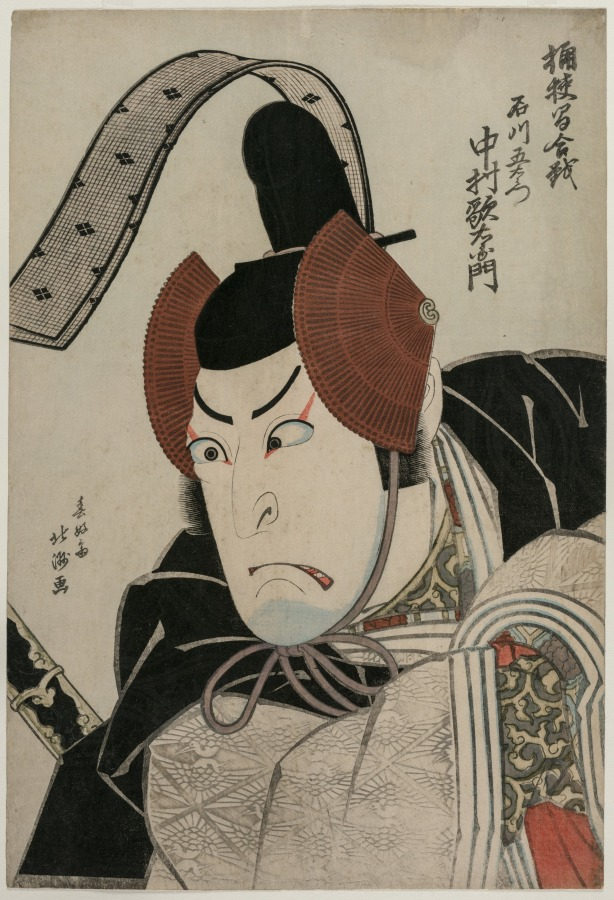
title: Actor Nakamura Utaemon III (Shikan) as Ishikawa Goemon at the Battle of Okehazama (Okehazama Gassen)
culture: Japan, Edo period (1615–1868)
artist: Shunkōsai Hokushū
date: 1826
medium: color woodblock print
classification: Print